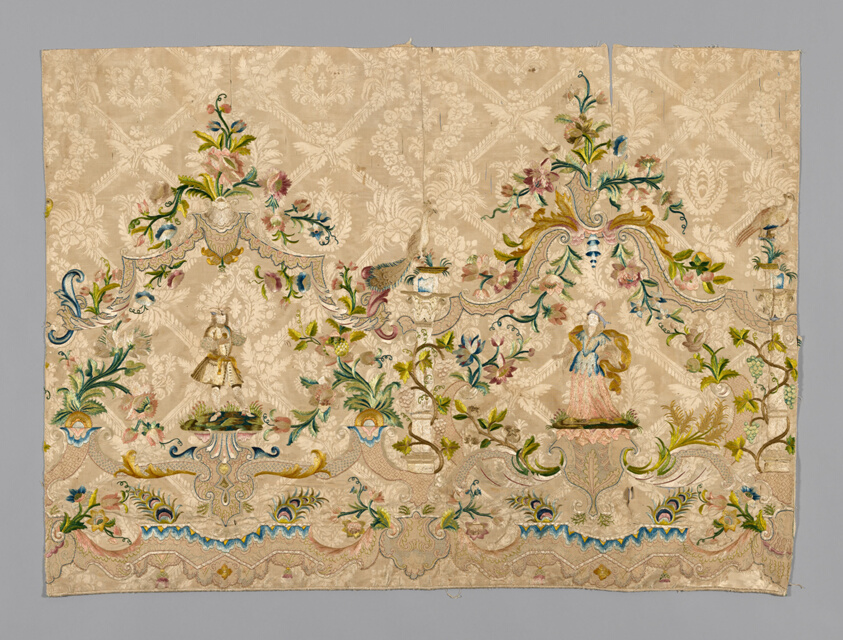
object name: Textile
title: Skirt panel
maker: France or Spain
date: 18th century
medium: Embroidered silk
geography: France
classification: textile; costume - needlework; needlework - costume